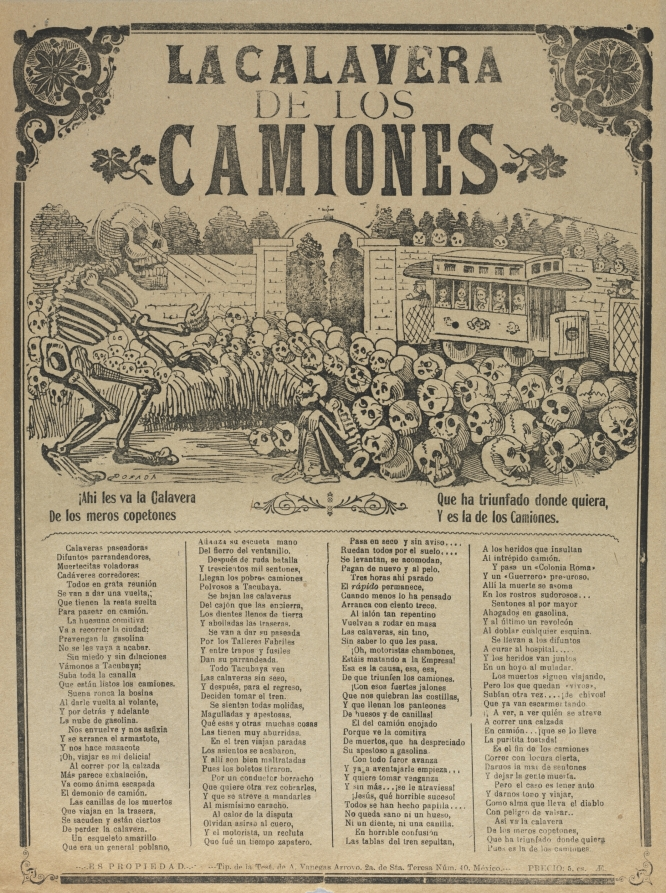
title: The Skeleton of the Buses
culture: Mexico, 20th century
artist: José Guadalupe Posada (Mexican, 1852–1913)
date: c. 1900–10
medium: relief etching and letterpress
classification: Print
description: A number of 20th-century Mexican artists admired José Guadalupe Posada for reaching a broad public through striking imagery and inexpensively printed works. Posada combined image and text in his depictions of social and political issues so that they were accessible to workers, many of whom were illiterate. This print is part of a series in which he used skeletons to humorously comment on current events, such as the danger of electric trams in Mexico City. A streetcar delivers passengers to the figure of Death, who beckons them forward, suggesting that the graveyard where he stands is an inevitable stop on their journey.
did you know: José Guadalupe Posada used inexpensive materials and printmaking techniques designed for mass production to make his works accessible to all.